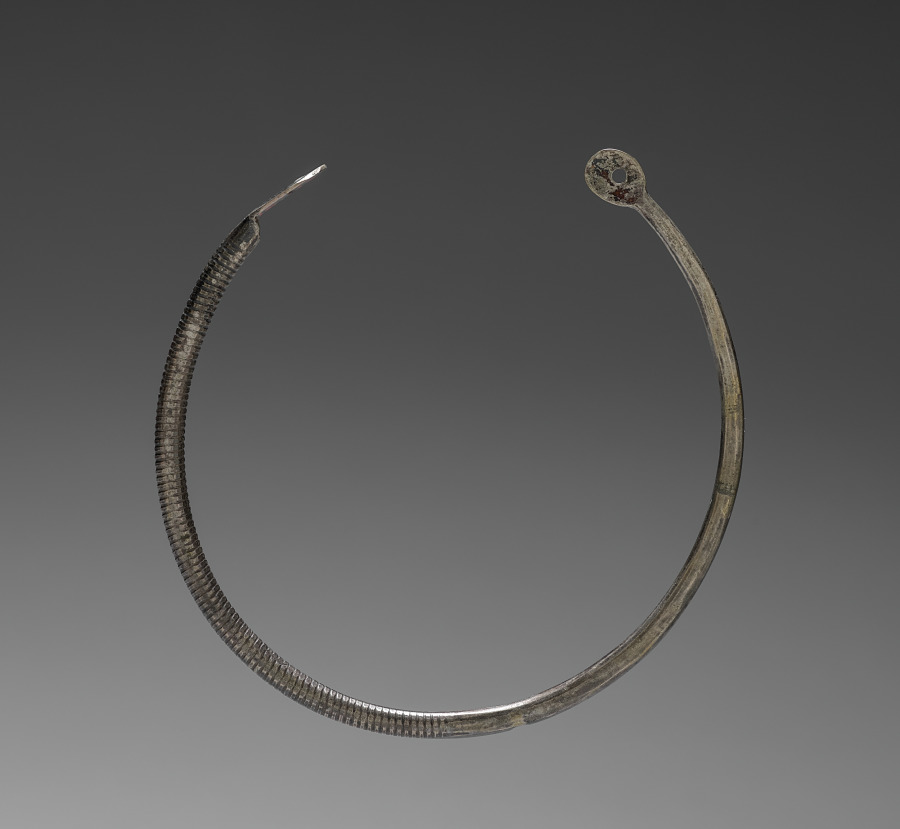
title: Nose Ring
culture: Indo-Chinese, made in France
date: 20th Century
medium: silver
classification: Jewelry